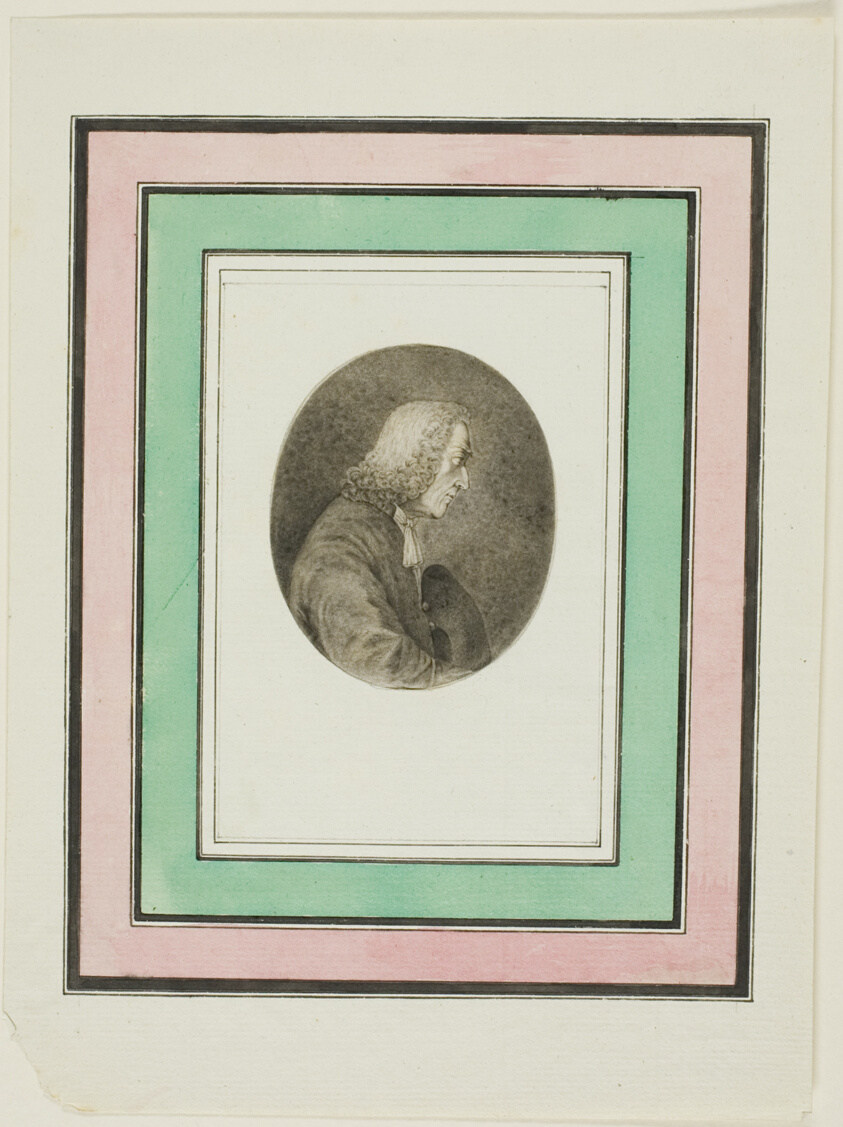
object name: Print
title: Jean Joseph Grateloup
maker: Jean-Baptiste de Grateloup (French, 1735-1817); Jean Pierre Sylvestre (French)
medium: Engraving on paper framed with painted paper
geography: France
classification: ink or chalk wash; drawings (visual works); prints and drawing; print